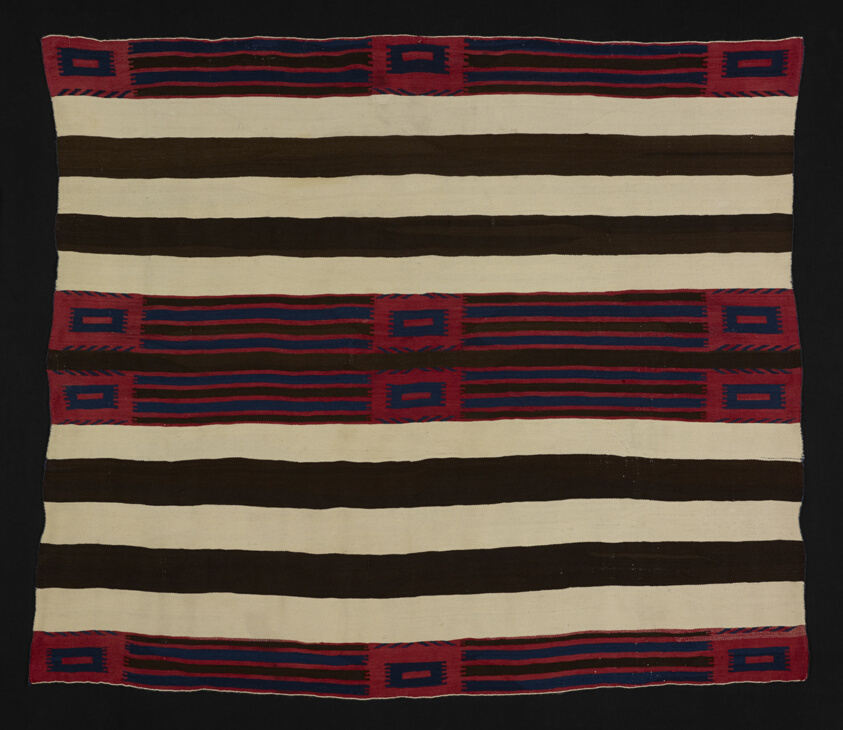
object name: Costume and Accessories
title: Wearing Blanket (Phase II)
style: navajo, americas, dine, 19th century, Arts of the Americas, indigenous, southwest, native american, north american, native north american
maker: Navajo (Diné) (Arizona, New Mexico, and Utah, United States)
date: 1850-65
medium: Wool; single interlocking tapestry weave; twined edges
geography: Navajo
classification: textile; blanket (covering); costume; garment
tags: geometric, arrow, squares, stripes